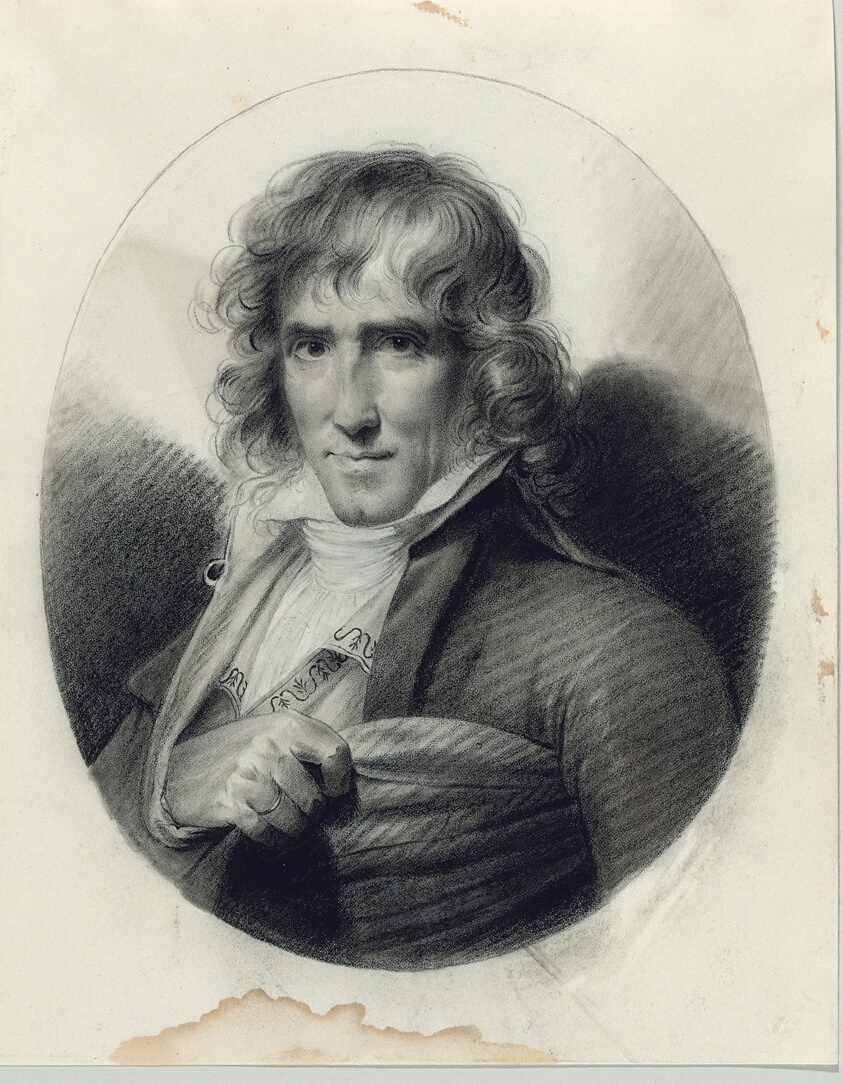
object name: Drawing and Watercolor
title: Portrait of the Artist Joseph Chinard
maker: Jean-Baptiste Isabey (French, 1767–1855)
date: 1799/1802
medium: Black chalk, with stumping and erasing, and touches of brush and black watercolor, heightened with gum Arabic and lead-white gouache (partially discolored), on off-white wove paper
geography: France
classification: drawings (visual works); paper; chalk; prints and drawing